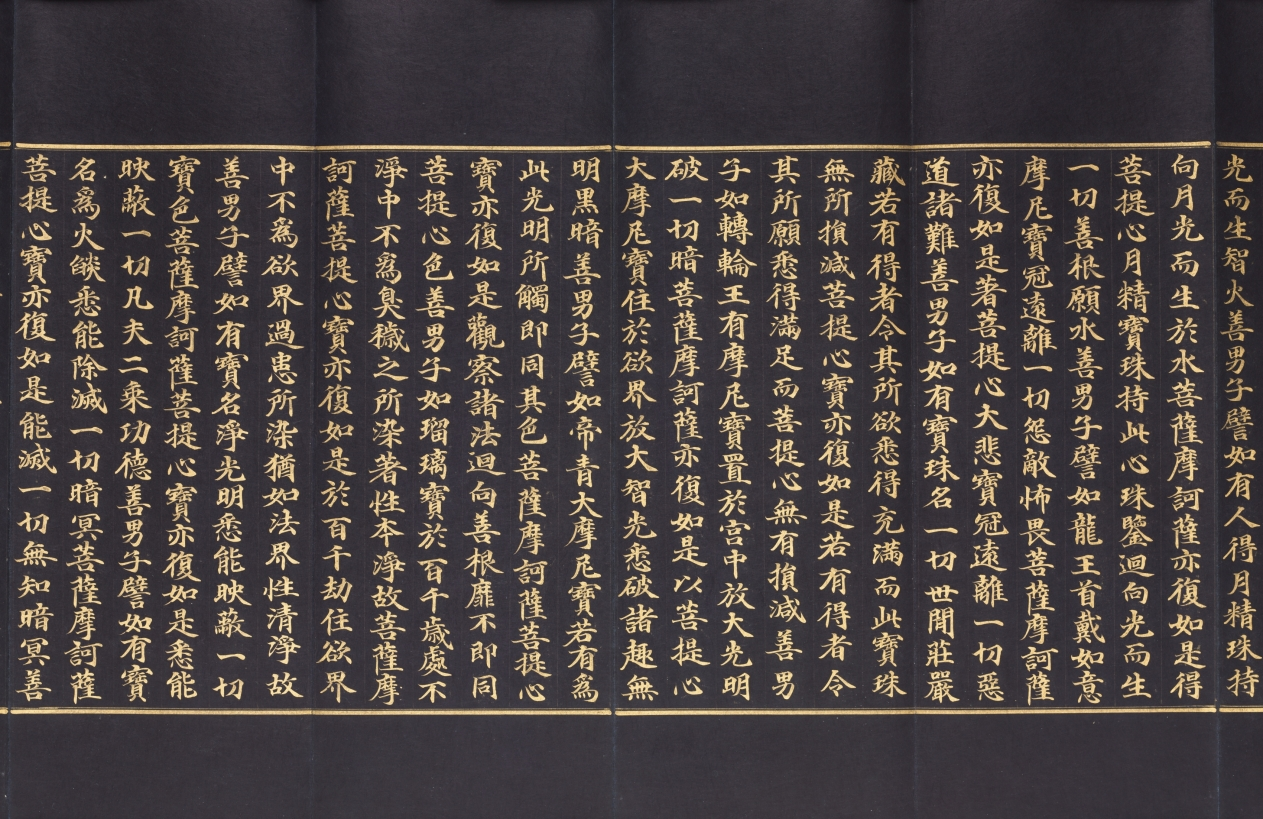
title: Avatamsaka Sutra No. 78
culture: Korea, Goryeo dynasty (918–1392)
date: 1300s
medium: Folded book with illustrated frontispiece; gold and silver on mulberry paper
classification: Bound Volume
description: This illuminated manuscript presents one part of the multivolume sacred text titled Avatamsaka (Flower Garland) sutra. Both the script and the image are rendered in gold ink on the smooth surface of the dark blue, indigo-dyed mulberry paper. This portion of the text, which reads from right to left, describes the encounter of the Buddha of the Future (Maitreya) and the young pilgrim Sudhana. The Buddha gives his words of wisdom to Sudhana, who asks questions about the path toward spiritual awakening. Mixed with ink and glue, the gold has a brilliance that strikingly reflects Sudhana’s ardent quest for understanding the way to reach enlightenment.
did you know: The pristine condition of this manuscript indicates that it was rarely used after its creation, revealing that the act of making a manuscript rather than reading it was the main religious goal.